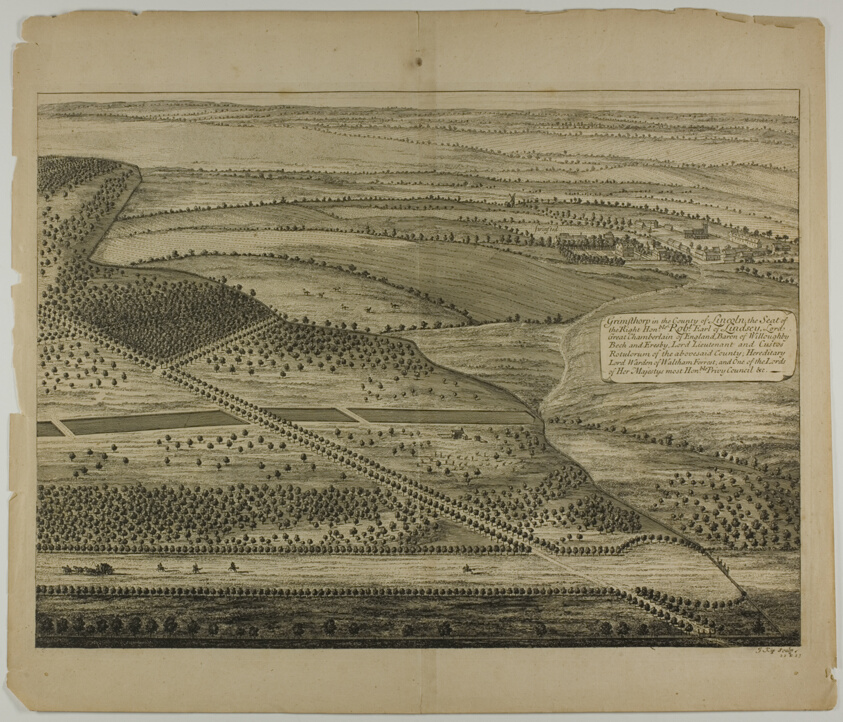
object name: Print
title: Grimthorp in the County of Lincoln, plate 23 from Britannia Illustrata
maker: Jan Kip (Dutch, c. 1653-1722); after Leonard Knyff (Dutch, 1650-1721); published by David Mortier (French, 1673-1728)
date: published 1707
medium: Etching, with engraving, in black on cream laid paper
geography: Netherlands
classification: prints and drawing; engraving; etching; print